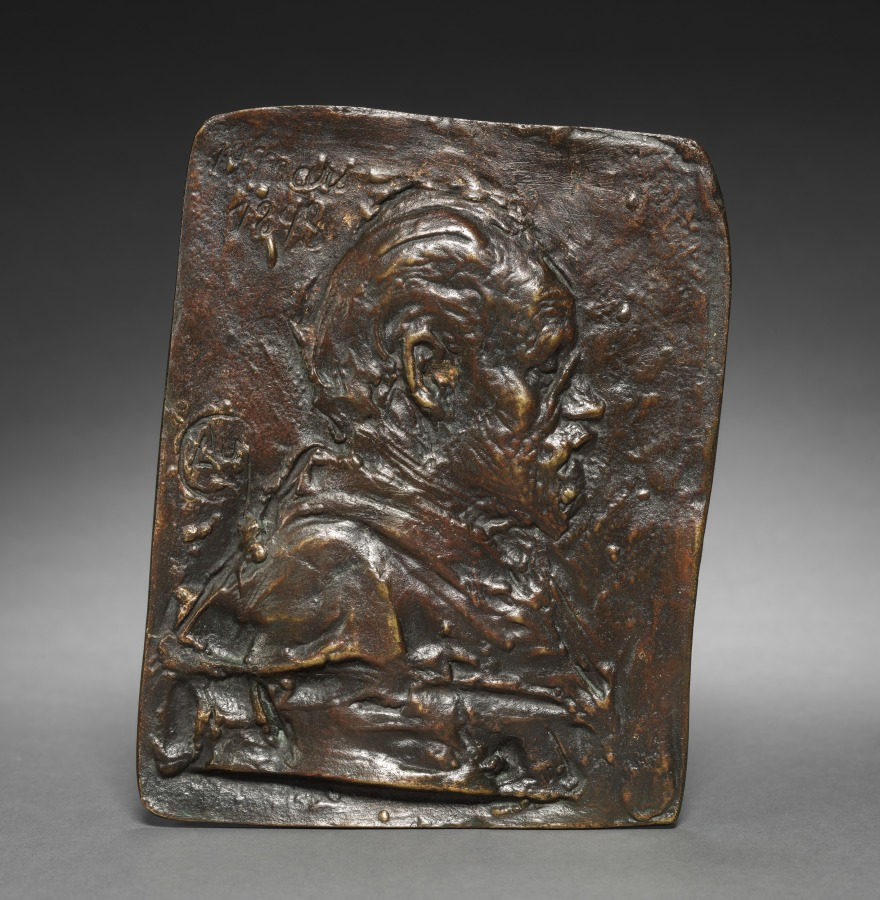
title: Zola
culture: France, 19th century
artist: Alexandre-Louis-Marie Charpentier (French, 1856–1909)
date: 1898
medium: bronze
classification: Sculpture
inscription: inscription incised by hand in mold in upper right corner: "19 Mars/1898" inscribed in lower right by hand in the mold: the number 9 and the letters AU